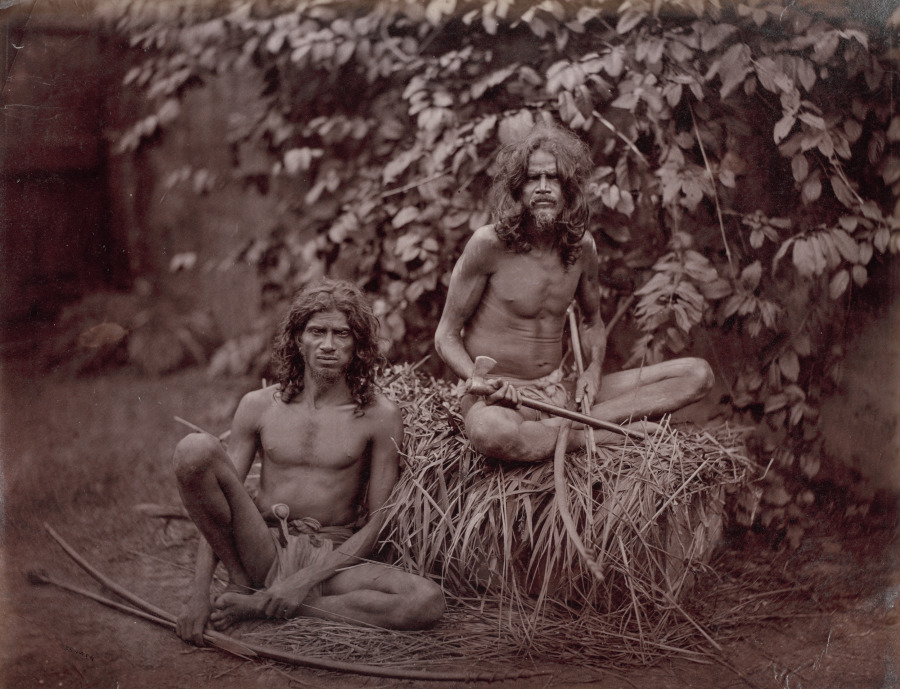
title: Veddahs of Ceylon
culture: India, 19th century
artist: Scowen & Co. (British, active Ceylon, 1876–1895)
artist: or Skeen & Co. (British, active 1860–1920)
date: c. 1880s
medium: albumen print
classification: Photograph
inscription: Written in pencil on verso: “Veddahs”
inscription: Unidentified watermark on the upper edge of the photograph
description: The Veddahs or Veddas are an indigenous minority in Ceylon (now Sri Lanka) that may have been the island’s earliest inhabitants. These men are dressed in typical scant Vedda male garb for the 19th century—loincloths tied with a rope at the waist.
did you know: The Veddahs were originally animists who believed that plants and inanimate objects had souls.